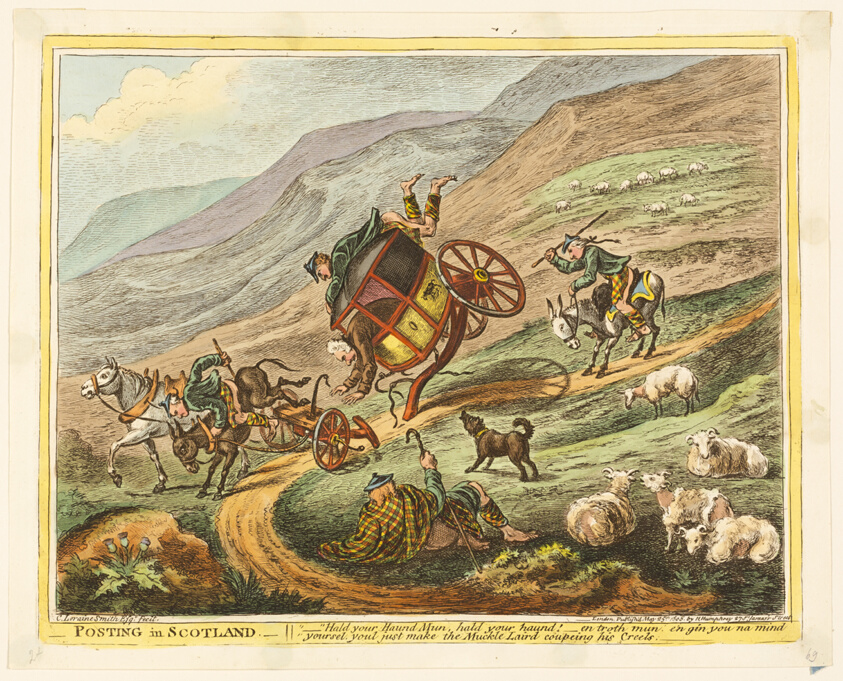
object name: Print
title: Posting in Scotland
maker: James Gillray (English, 1756-1815); published by Hannah Humphrey (English, c. 1745-1818)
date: published May 25, 1805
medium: Hand-colored etching and aquatint on paper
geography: England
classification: etching; print; prints and drawing